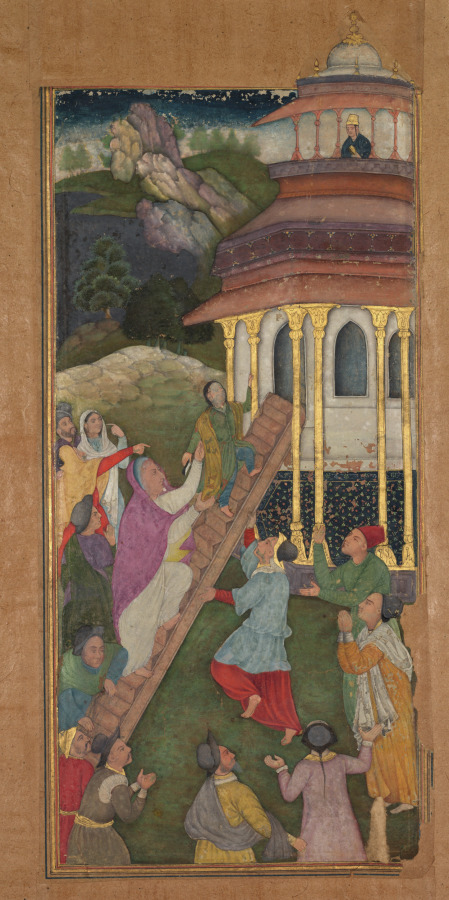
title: Mary ascends the stairs to the temple, from a Mirror of Holiness (Mir’at al-quds) of Father Jerome Xavier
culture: Mughal India, Allahabad, made for Prince Salim (1569–1627)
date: 1602–4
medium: Gum tempera, ink, color, and gold on paper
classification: Manuscript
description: Three-year-old Mary bounds up the stairs of the temple, eager to begin her education. Onlookers gesture in surprise. In the background the rocks have been cleverly shaded to look like faces—a Persian technique of visual double-entendre that the Mughals admired and adopted. This work is the second of the 27 surviving paintings made for this manuscript. The first, a scene of Mary’s birth, is in a private collection in Europe. Mary’s face had been painted with a fragile white paint, which has fallen off. Now only the underdrawing remains visible.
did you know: Mary’s instructor awaits her, book in hand, at the top of a temple of learning.